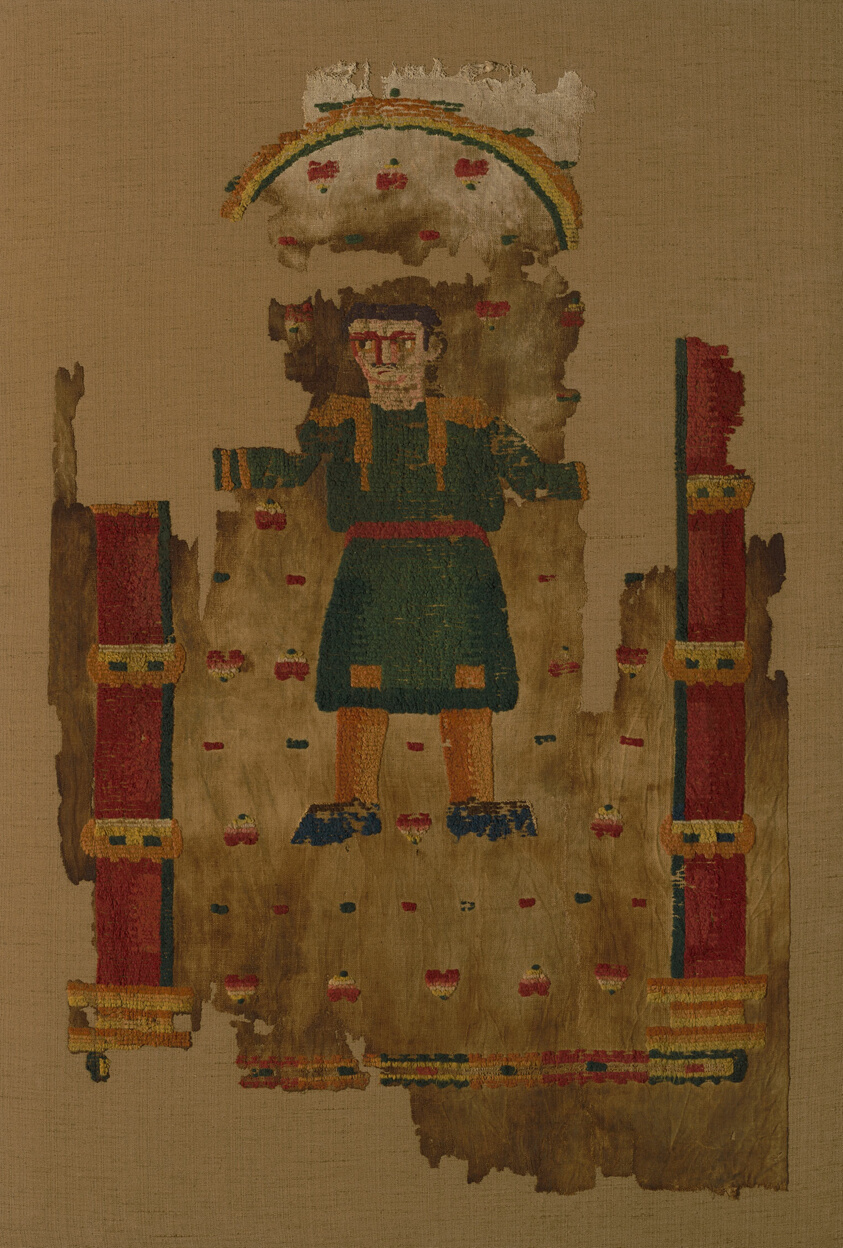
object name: Coverings and Hangings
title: Fragment (Hanging)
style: roman period (egyptian), coptic (period)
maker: Byzantine; Egypt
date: Roman period (30 B.C.– 641 A.D.), 5th/6th century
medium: Linen and wool, plain weave with weft uncut pile and embroidered linen pile formed by variations of back and stem stitches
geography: Egypt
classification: textile; weaving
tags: men, architecture, decoration, columns, arches